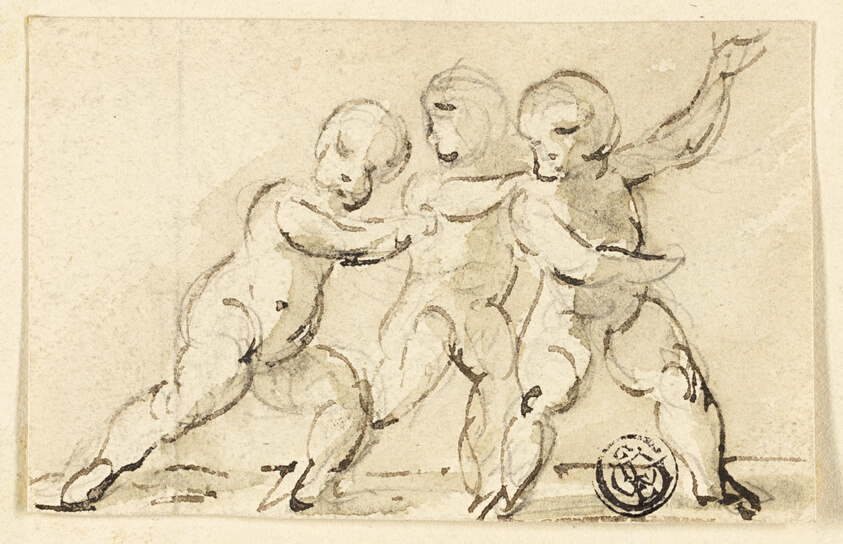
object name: Drawing and Watercolor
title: Three Putti at Play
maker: Attributed to Thomas Stothard (English, 1755-1834); or possibly Samuel De Wilde (English, 1748-1832)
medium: Pen and brown ink with bush and brown wash over graphite, on ivory wove paper, tipped onto ivory wove paper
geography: England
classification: pen and ink drawings; drawings (visual works); prints and drawing